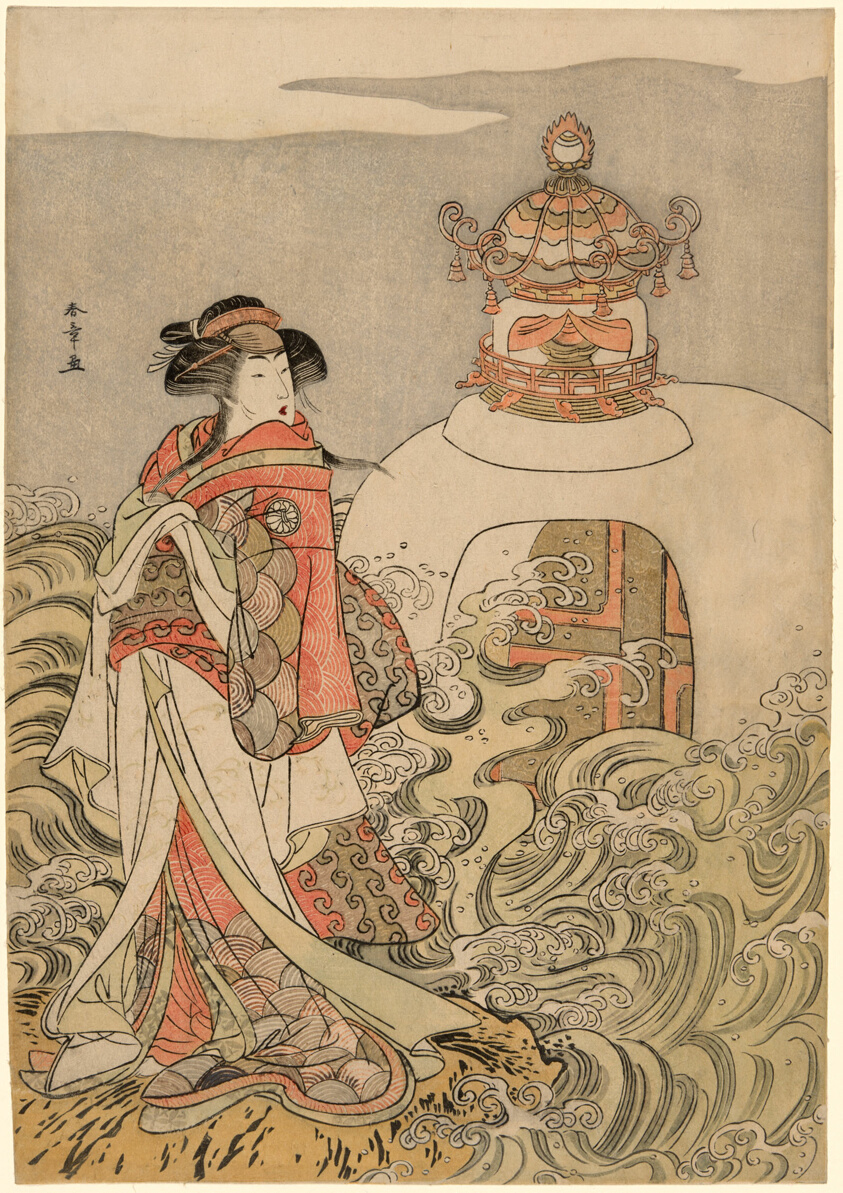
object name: Print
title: Actor Segawa Kikunojô III as the Dragon Princess in the Play “Saki Masuya Ume no Kachidoki”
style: Japanese (culture or style)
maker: Katsukawa Shunshô 勝川 春章; Japanese, 1726-1792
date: About 1778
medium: Color woodblock print; ôban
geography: Japan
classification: woodblock print; print; asian art